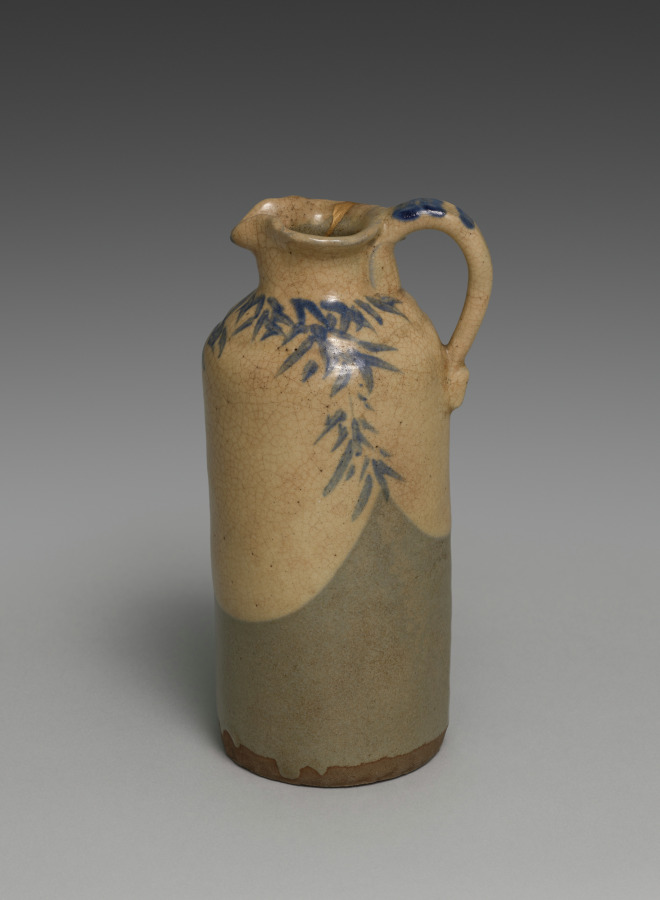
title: Sake Pourer with Bamboo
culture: Japan, Edo period (1615–1868)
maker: attributed to Seifū Yohei I (Japanese, 1801–1861)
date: c. 1844–57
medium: one of a pair of sake flasks; stoneware with white slip, underglaze blue and gold repair (kintsugi) (Kyoto ware)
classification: Ceramic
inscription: The storage box for the pair of vessels is inscribed and impressed with seals.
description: This pair of sake pourers adorned with with bamboo and bellflowers is attributed to the founder of the Seifū Studio, Seifū Yohei I (1801–1861). Yohei I, the lineage founder, was born to the Yasuda family in the city of Kanazawa, which faces the Sea of Japan. His home province of Kaga (in present-day Ishikawa Prefecture) produced its own ceramics, known as Kutani ware, but for his training as a potter, Yohei I chose Kyoto, which produced the more technically advanced porcelainware. He moved to Kyoto around the 1820s and became apprenticed to Nin’ami Dohachi, a leading potter in the city. He later struck out on his own, and it is likely that his teacher gave him the name Seifu Yohei. His works include many exquisitely painted copies of Chinese porcelain, and he also produced stoneware with overglaze color enamels that emulated works in the style of Ogata Kenzan (1663–1743) at which his teacher excelled.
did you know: Sake may be served heated or chilled, and, as with wine, the recommended serving temperature of sake varies greatly by type.